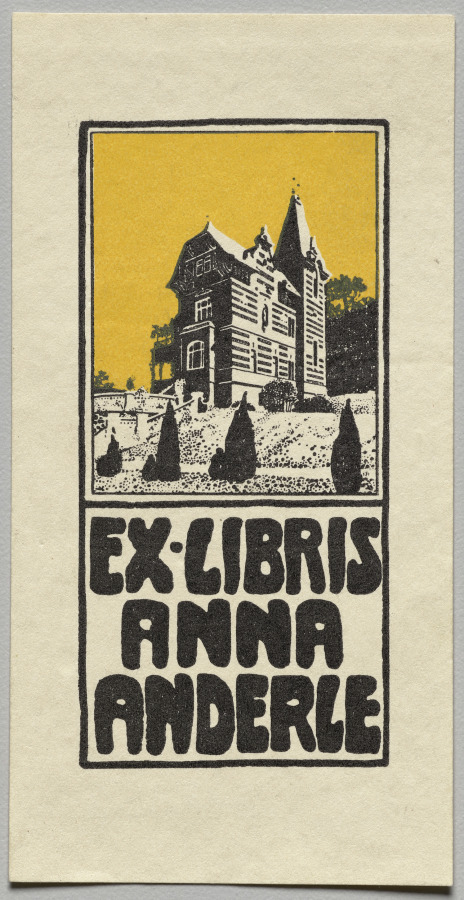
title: Bookplate: Anna Anderle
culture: Germany, 19th-20th century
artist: Alfred Roller (German, 1864–1935)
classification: Print